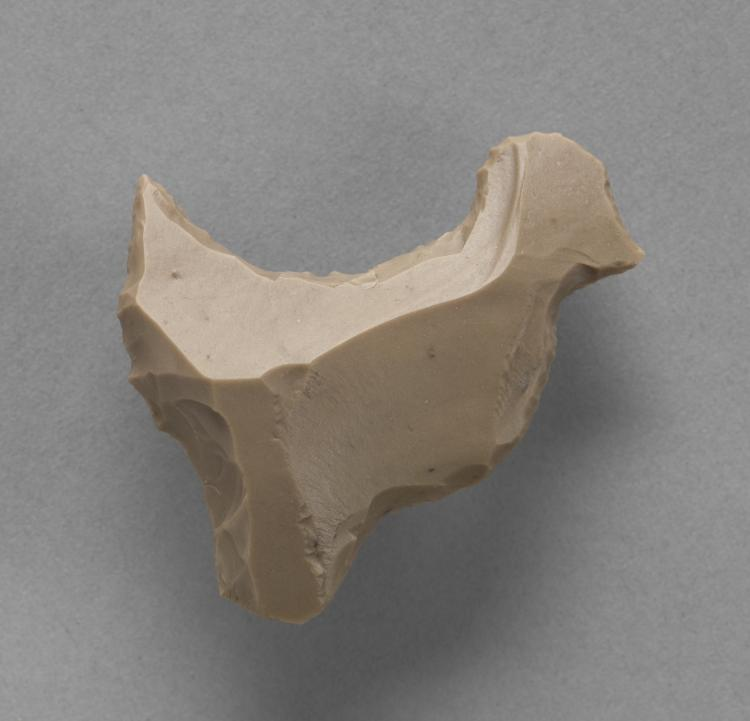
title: Flint in the Form of a Bird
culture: Egypt, Predynastic (5000–2950 BCE), Naqada II–III (3650–3000 BCE)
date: 4000–3000 BCE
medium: tan-colored flint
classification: Implements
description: This flint is ground on one side and ripple-flaked on the other, indicating the date. Nonrepresentational flints were tools and weapons. Representational ones like this, however, were undoubtedly tomb gifts and never used. The type of bird represented is a Guinea fowl or quail. A number of Egyptian flints in this form are known although this one is one of the largest and is of exceptional quality.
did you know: The exact function of objects like this is unknown; it may have been an amulet or charm.